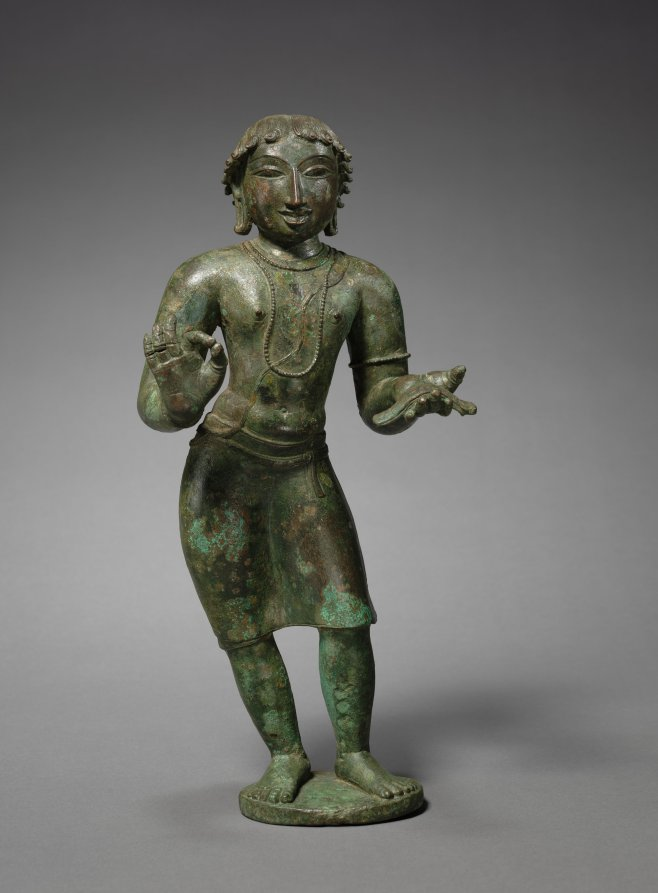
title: Shiva Saint: Manikkavachakar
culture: South India, Tamil Nadu, 12th-13th century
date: 1100s–1200s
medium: bronze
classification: Sculpture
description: During the 7th through 9th centuries in south India there was a devotional movement of saints who experienced personal mystical encounters with their god. They then composed poems and songs in their native language of Tamil that described the ecstasy and experiences of the interaction. Manikkavachakar was one of these saints; he lived during the 9th century and composed some of the most popular Tamil devotional hymns about his visions of Shiva. In his left hand he holds the pages of texts that refer to his poetry and songs.